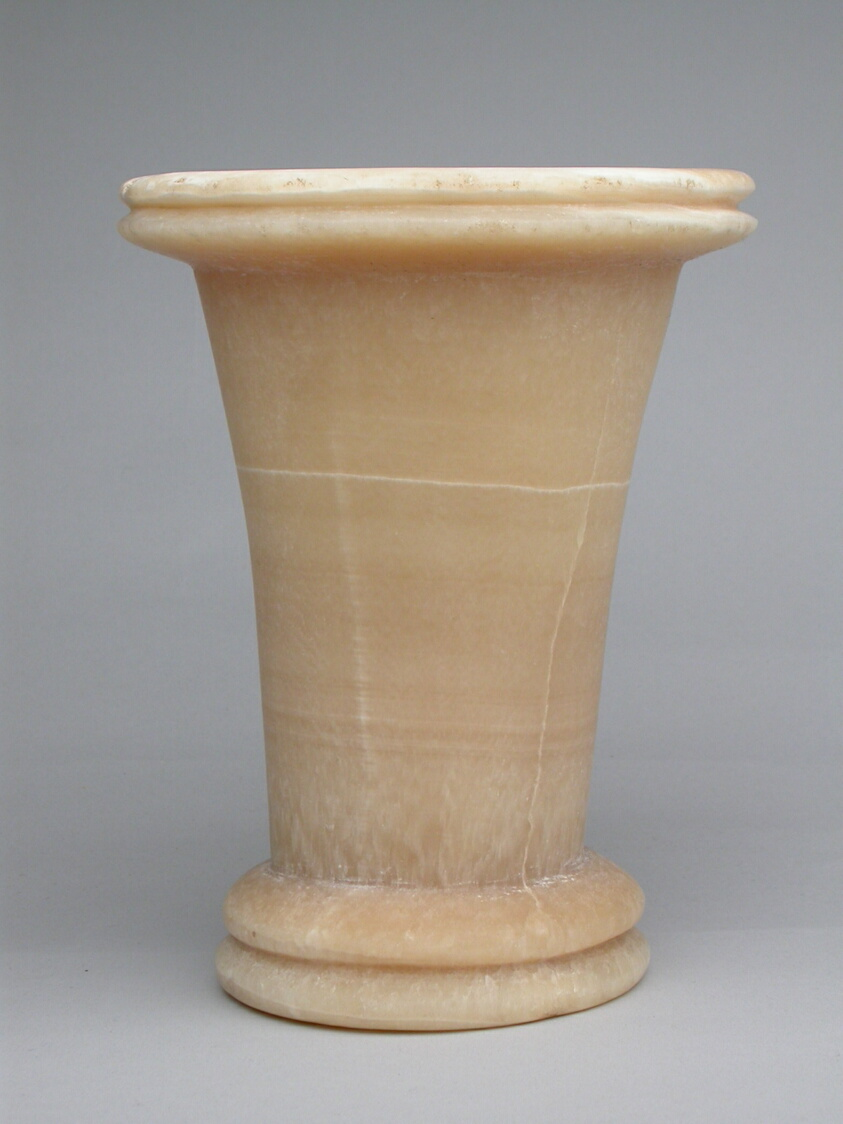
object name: Vessel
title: Unguent Jar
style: ptolemaic, greco-roman (egyptian)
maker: Egyptian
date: Ptolemaic Period (332–30 BCE)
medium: Travertine (Egyptian alabaster)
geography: Egypt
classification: personal grooming / hygiene / cosmetic container; stone; vessel; ancient art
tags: jar